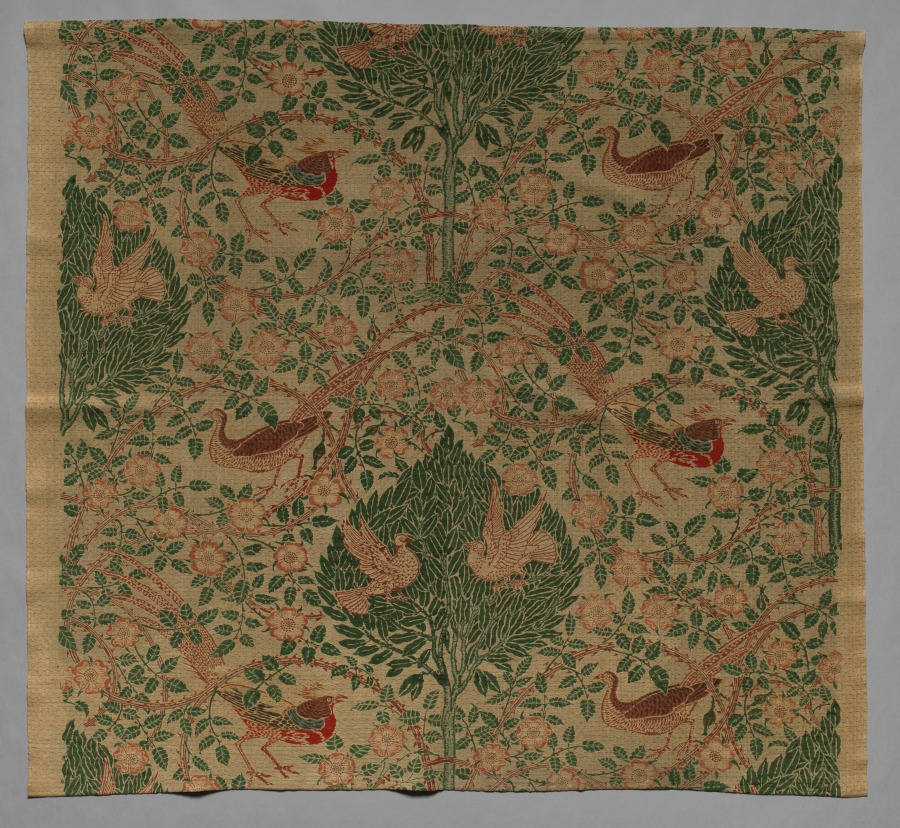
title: Cloth with Rooster and Hen Design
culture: Unassigned, 19th century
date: c. 1890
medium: roller printed cotton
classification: Textile